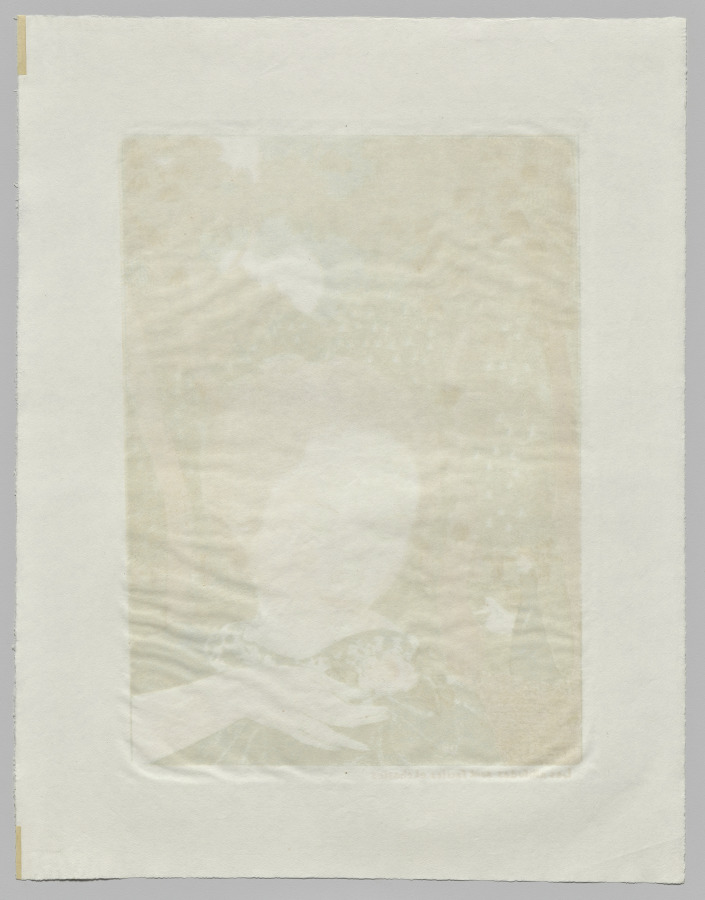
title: Attitudes are Easy and Chaste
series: Love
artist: Maurice Denis (French, 1870–1943)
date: 1899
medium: color lithograph on wove paper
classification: Print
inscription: Recto, lower left: “Les attitudes sont faciles et chastes”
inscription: In graphite, recto, lower right: “Maurice Denis (signed)”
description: Maurice Denis belonged to the Nabis, a group of artists who came together in 1889 to pursue a radical new style informed by subjective experience and emotion. This print is from a series in which Denis explored his devotion to his wife, Marthe, by depicting her in a variety of settings alongside titles drawn from his own journal. The vague but evocative images were meant to encourage the viewer to draw connections to the theme and meditate on its meaning.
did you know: Maurice Denis was a devout Catholic and often drew visual connections between his wife, Marthe, the subject of this print series, and the Virgin Mary.